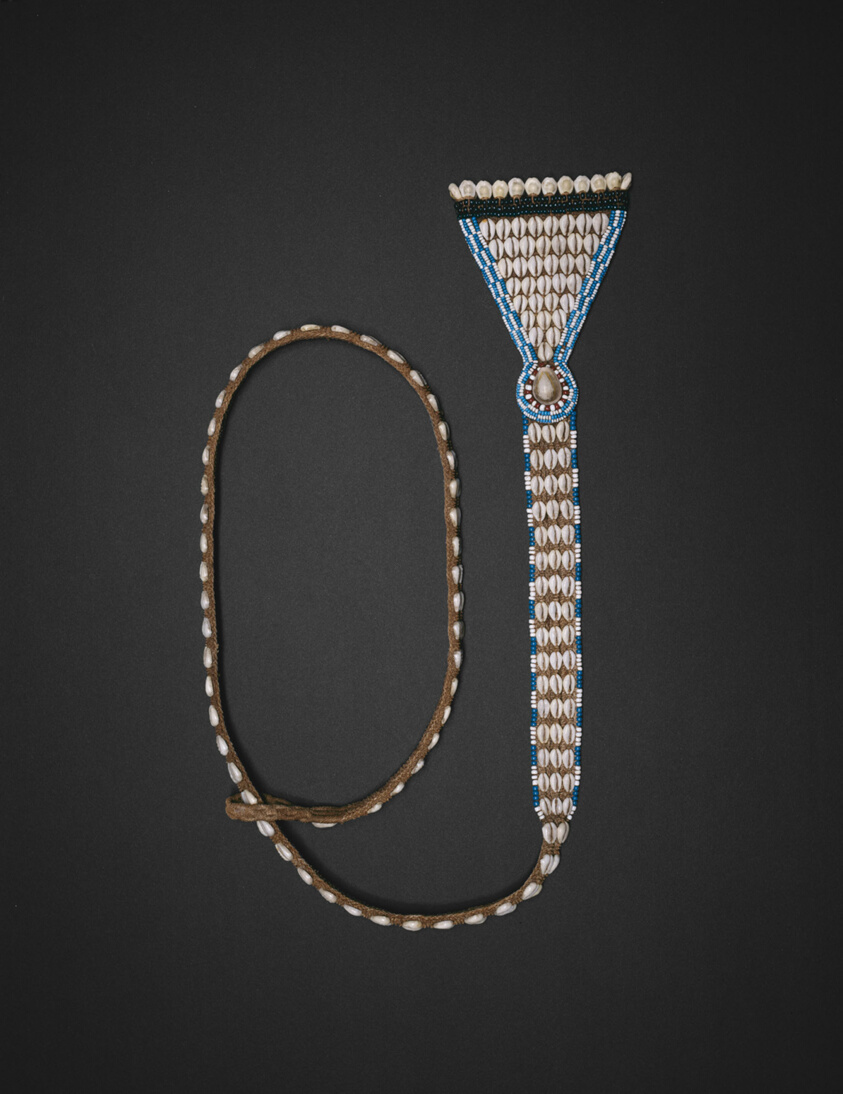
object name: Costume and Accessories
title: Pendant Belt (Nkody Mupaap)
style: kuba (democratic republic of congo style, Arts of Africa, african Art, Central Africa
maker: Kuba; Kasai region, Democratic Republic of the Congo; Central Africa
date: 19th century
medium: Jute, raffia, cowrie shells, and beads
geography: Democratic Republic of the Congo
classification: pendant (jewelry); shell; arts of Africa; belts (costume accessory); african art; jewelry; costume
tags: belt